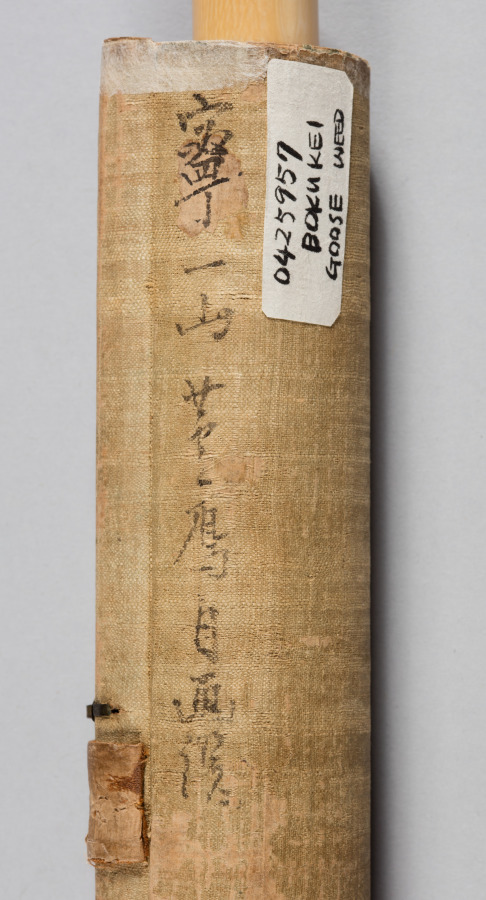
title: Reeds and Geese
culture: Japan, Kamakura period (1185–1333)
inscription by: Yishan Yining [Issan Ichinei] (Chinese, 1247–1317)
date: 1314–17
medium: hanging scroll; ink on paper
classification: Painting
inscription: signed: Issan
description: Reeds and geese has been a common pairing in Chinese literary and visual culture for many centuries. This painting presents the contribution of a Japanese amateur painter, almost certainly a Zen Buddhist monk, to Japan’s fledgling efforts to add the theme to its own cultural vocabulary in the early 1300s. As was customary at the time in Japan, the painter did not sign or seal his work; the inscription, a poem added to the painting by the eminent émigré monk Yishan Yining, along with his signature and seal, was of far greater cultural value. Today, the modestly sized painting has tremendous significance as one of the earliest surviving examples of Japanese ink paintings with reeds and geese.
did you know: Tokyo National Museum owns a copy of this painting made by Kano Gyokusen (1796–1864) when he was 14 years old.